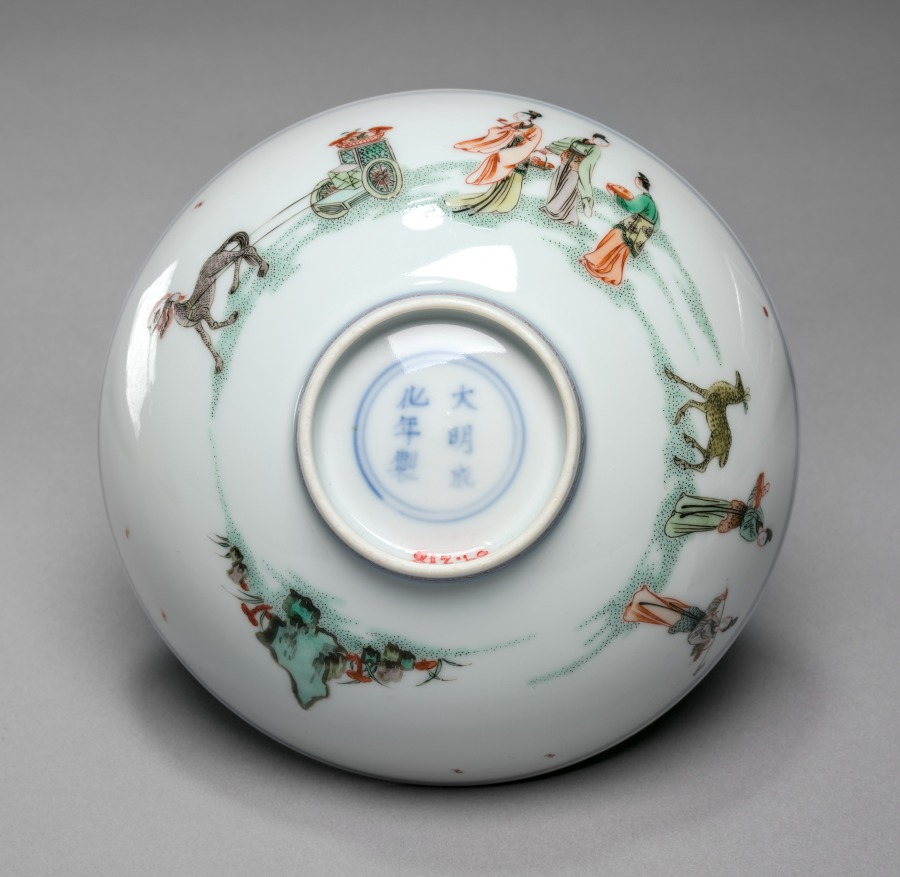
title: Bowl with Xiwangmu and Attendants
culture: China, Jiangxi province, Jingdezhen, Qing dynasty (1644-1911), Kangxi reign (1662-1722), but Chenghua mark (1465-87)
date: 1662–1722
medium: porcelain with famille verte overglaze enamel decoration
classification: Ceramic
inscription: 大明成化年製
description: Xiwangmu is the name for the Queen Mother of the West, an ancient Chinese goddess.